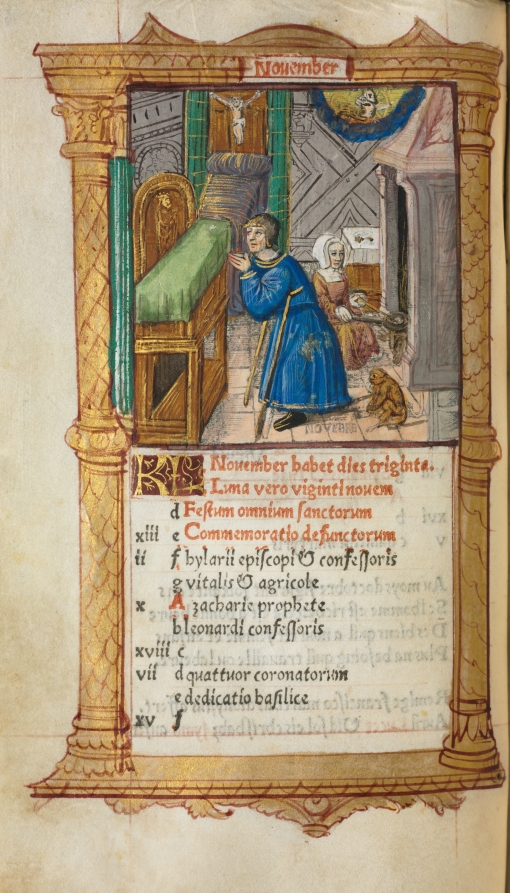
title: Printed Book of Hours (Use of Rome): fol. 12v, November calendar page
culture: France, Paris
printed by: Guillaume Le Rouge (French, Paris, active 1493–1517)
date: 1510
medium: 112 Printed folios on parchment, bound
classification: Bound Volume